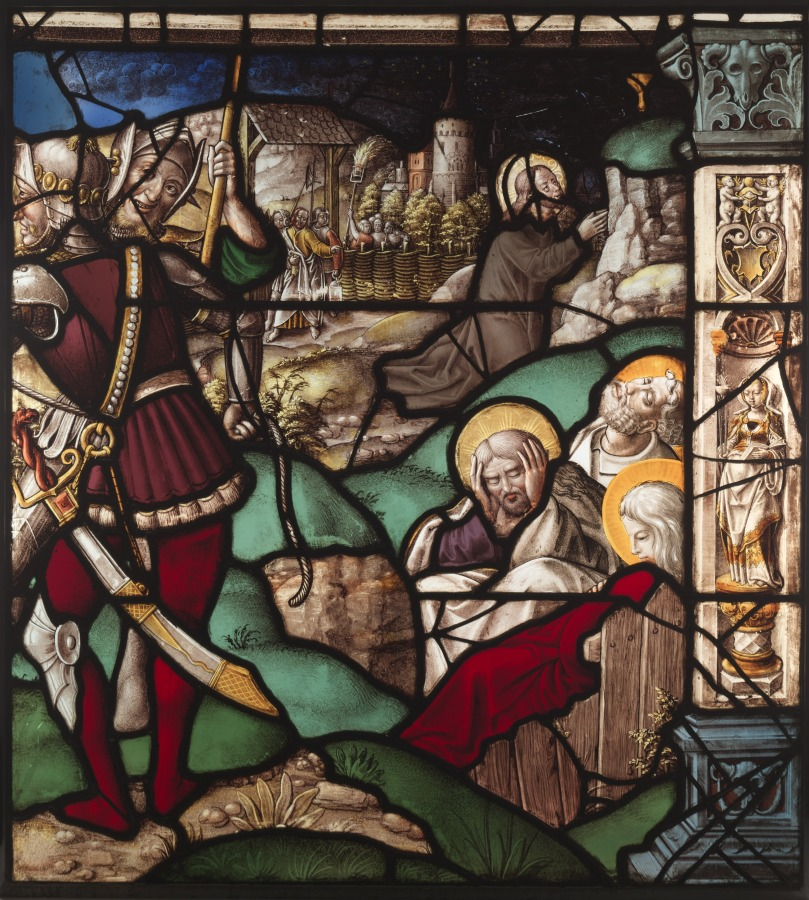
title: Christ in the Garden of Gethsemane and The Kiss of Judas (pair)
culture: Germany, Cologne, 16th century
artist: Everhard Rensig (German)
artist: or Gerhard Remisch (German)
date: 1522–1526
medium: pot-metal and white glass, silver stain and sanguine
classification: Glass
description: These two stained glass panels originally belonged to an extensive program of Old and New Testament subjects that originally decorated the cloister of the Cistercian Abbey of Mariawald, near Cologne. The original placement of glass at Mariawald involved windows composed of two openings. Each comprised three large glass panels plus a smaller tracery panel. Two scenes in each window represented Old Testament subjects (below) and the New Testament (above). Above the biblical narrative panels were smaller messenger panels depicting images of prophets with scrolls. At the base of each window were donor and patron saint panels. In this way, the Old Testament was shown to prefigure the events of the New. These two panels depicting scenes of Christ’s Passion were originally located in the north corner of the east cloister gallery with the Kiss of Judas on the left, and Christ in Gethsemane on the right. Mariawald was founded in 1480 and closed in 1802 when the stained glass windows were removed. Recent scholarship has attributed the glass to the Rhenish glass painters Everhard Rensig or Gerhard Remisch.